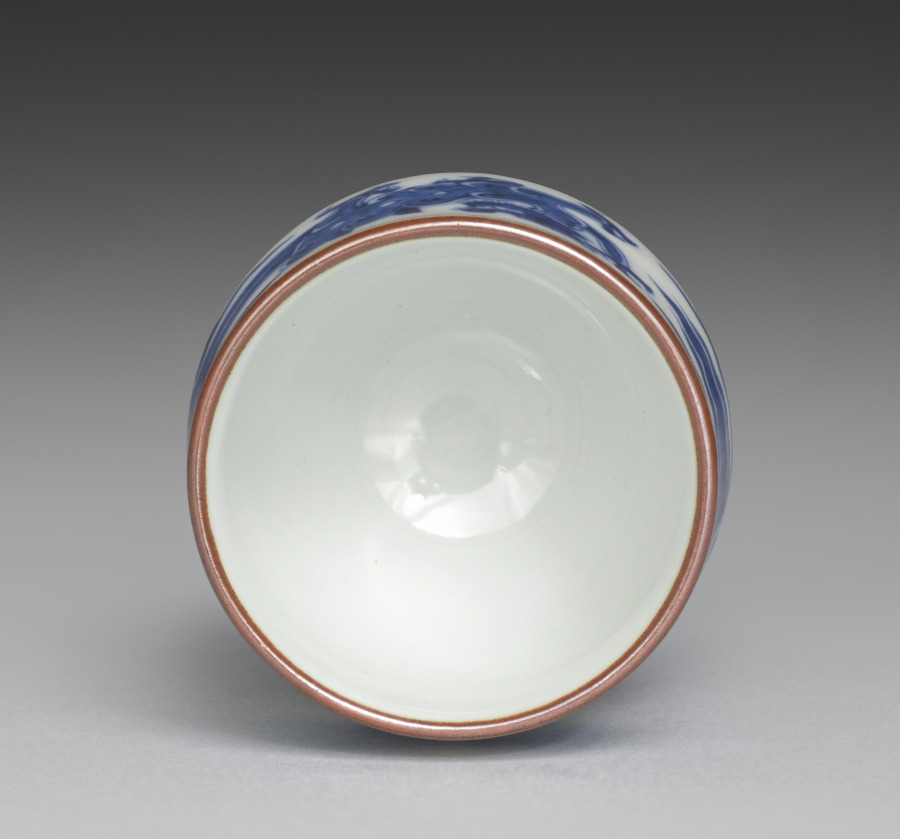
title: Cup from Sake Cups with Dragons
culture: Japan, Meiji period (1868–1912)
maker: Seifū Yohei III (Japanese, 1851–1914)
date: c. 1893–1914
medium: One from a set of six sake cups; porcelain with underglaze blue and iron oxide rims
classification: Ceramic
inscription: 大日本清風造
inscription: 清風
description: Each of these sake cups pictures two backward-looking dragons. The highly stylized creatures resemble jade carvings.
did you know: Seifū Yohei III was inspired by the Chinese mythical animals that were common on porcelain objects made at Jingdezhen in China during the Ming dynasty (1368–1644) and then exported around the world.